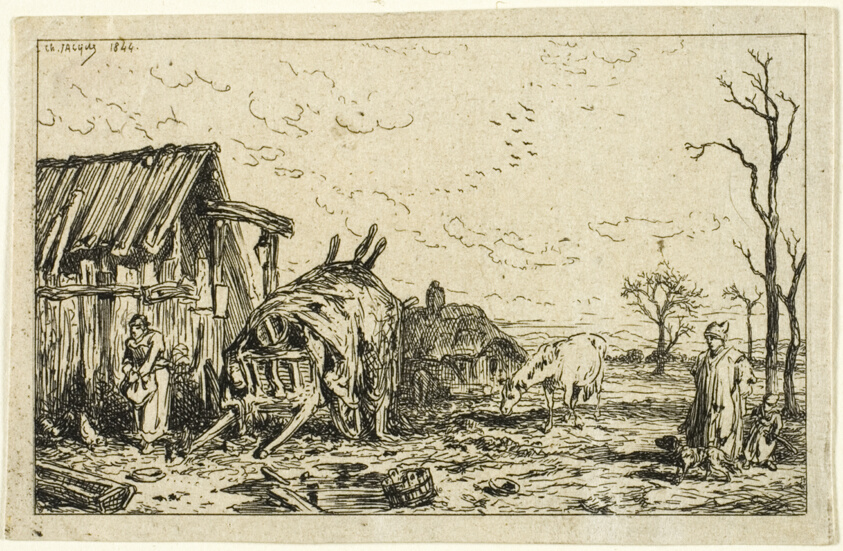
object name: Print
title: Landscape with Unhitched Cart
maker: Charles Émile Jacque (French, 1813-1894)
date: 1844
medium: Etching on buff chine laid down on ivory laid paper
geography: France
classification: etching; print; prints and drawing